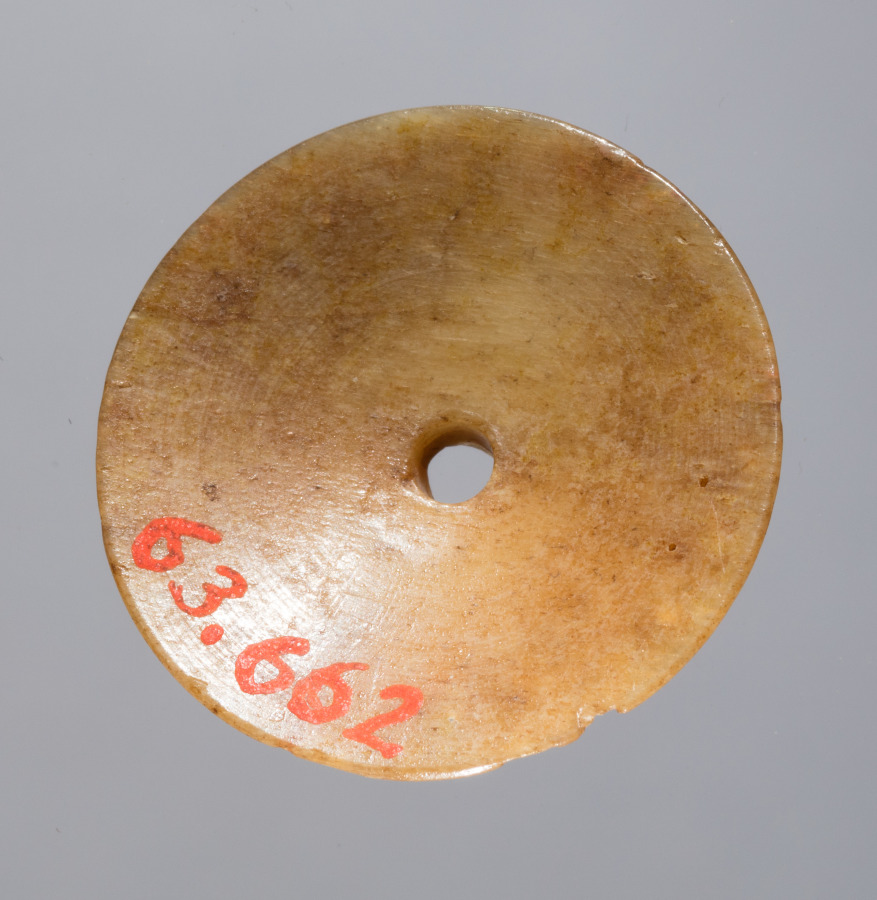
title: Spindle Whorl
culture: Iran, early Islamic period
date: 700s - 900s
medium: bone, incised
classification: Spindle Whorl